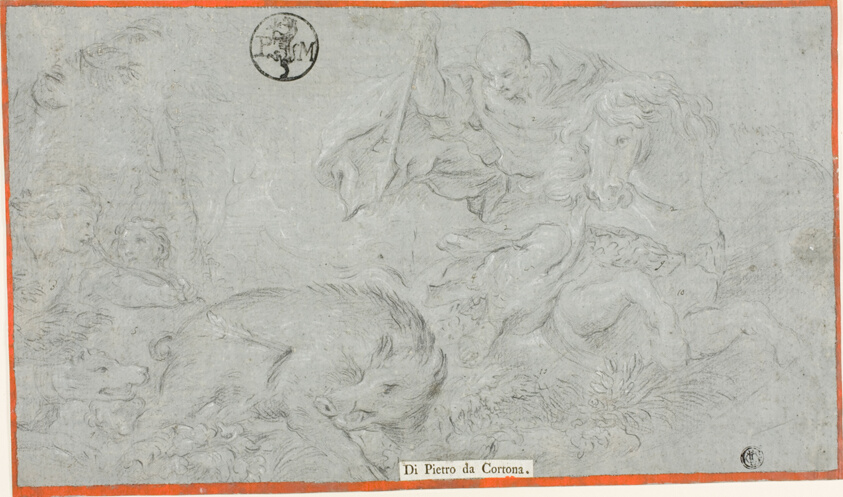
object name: Drawing and Watercolor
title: Copy of Scene from the Life of Sulla fresco, in the Hall of Saturn, Pitti Palace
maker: possibly Cesare Dandini (Italian, 1596-1657); or Vincenzo Dandini (Italian, 1607-1675); after Ciro Ferri (Italian, 1634-1689)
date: after 1665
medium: Black chalk, heightened with white chalk, with pen and brown ink and brush and red gouache, on blue-gray ground, on ivory laid paper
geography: Italy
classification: chalk; drawings (visual works); prints and drawing